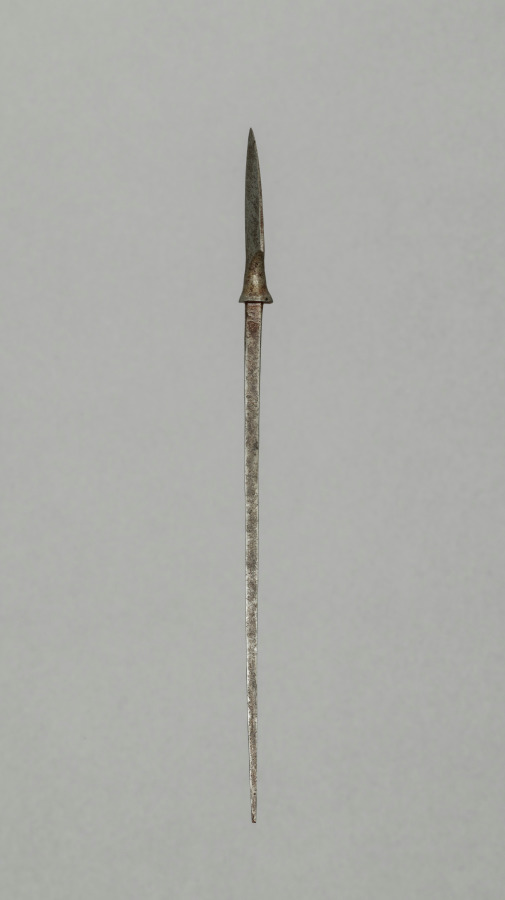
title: Arrow Point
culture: Japan, Edo period (1615–1868)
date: 1700s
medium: steel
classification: Arms and Armor